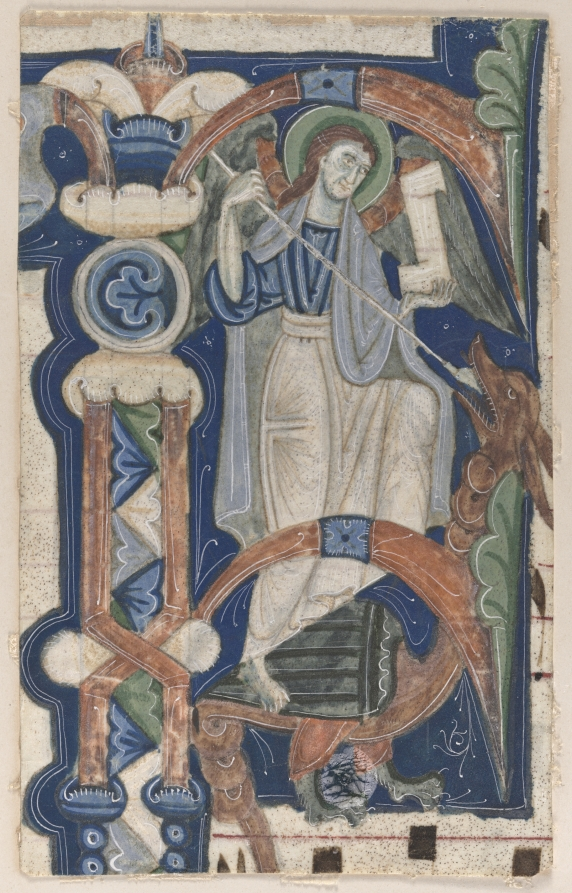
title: Historiated Initial (P) Excised from a Choral Book: St. Michael and the Dragon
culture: North Italy, Lombardy, 13th century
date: early 1200s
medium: ink and tempera on parchment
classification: Manuscript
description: The Archangel Michael was traditionally held to be the protector of souls. His intercessionary and protective role is connoted by his combat with and subjugation of the dragon as related in the Apocalypse of St. John the Evangelist. The present initial F is a type known as an "inhabited" initial. Here, the initial serves as a frame providing a display area for figural representation within.